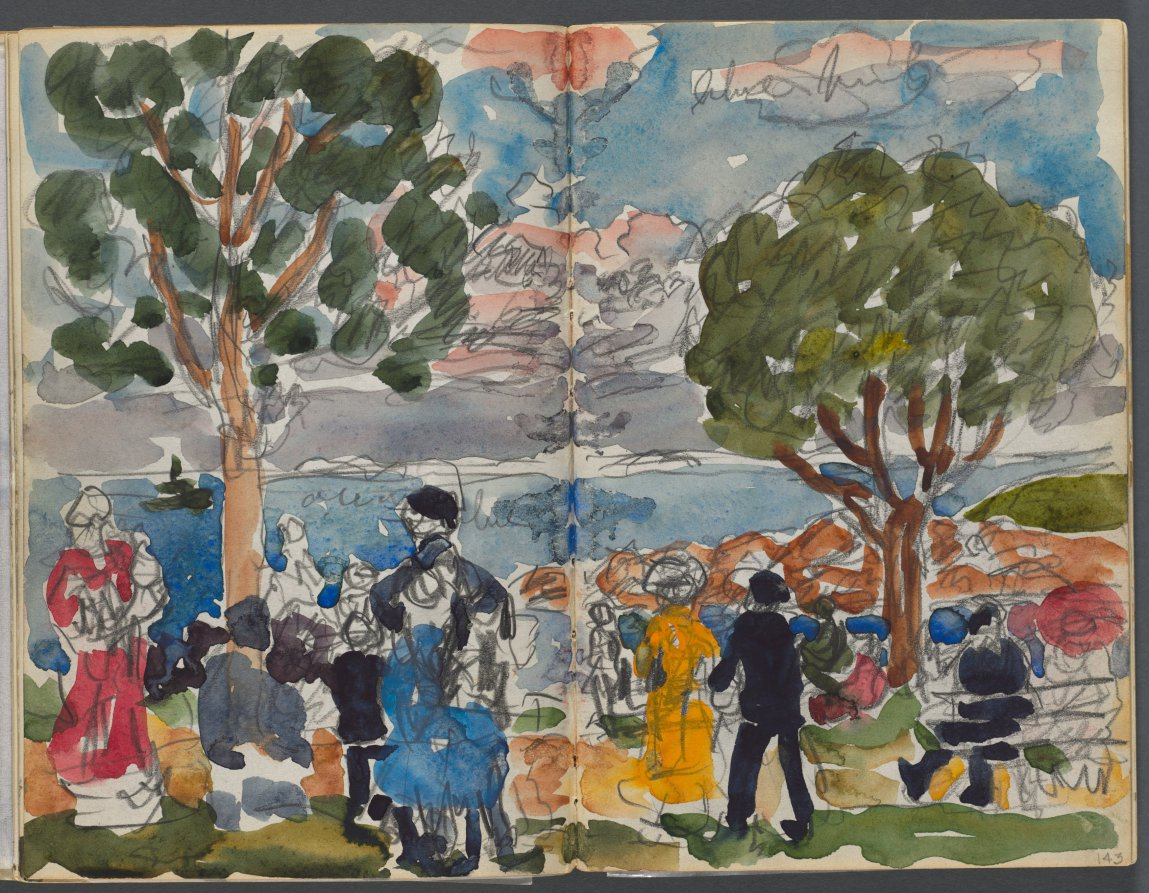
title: Sketchbook, The Dells, N° 127, page 142 & 143: Figures on a Coast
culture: America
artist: Maurice Prendergast (American, born Newfoundland [now Canada], 1858–1924)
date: c. 1919–1921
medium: graphite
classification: Bound Volume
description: This sketchbook contains 59 pages of graphite drawings and 16 watercolors made at various locations on Cape Ann, Massachusetts.